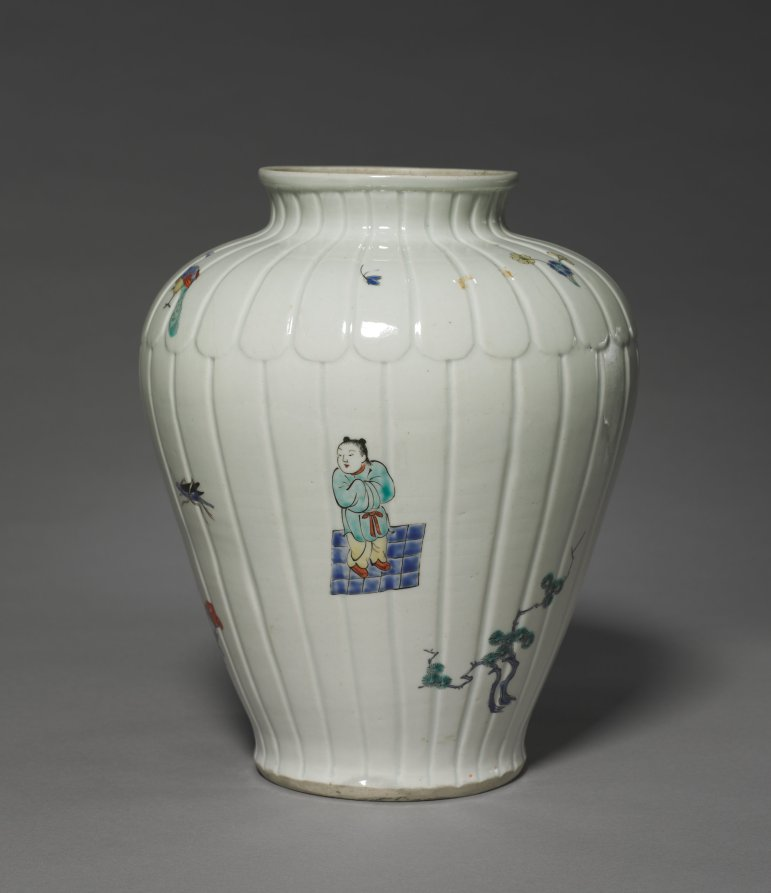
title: Vase with Floral, Insect, Bird, and Chinese Designs: Kakiemon Type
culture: Japan, Edo period (1615–1868)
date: late 1600s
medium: porcelain with overglaze enamel, gilding and carved decoration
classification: Ceramic